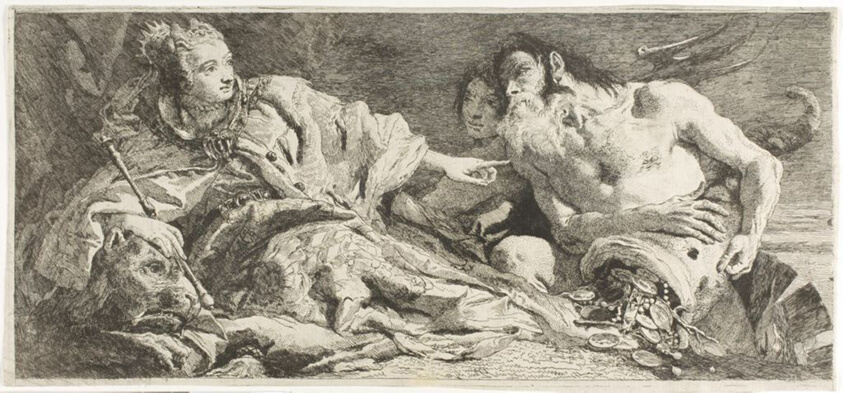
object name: Print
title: Venice Receiving Neptune's Homage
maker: Giovanni Domenico Tiepolo (Italian, 1727-1804); after Giambattista Tiepolo (Italian, 1696-1770)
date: after 1750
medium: Etching on paper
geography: Italy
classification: etching; print; prints and drawing